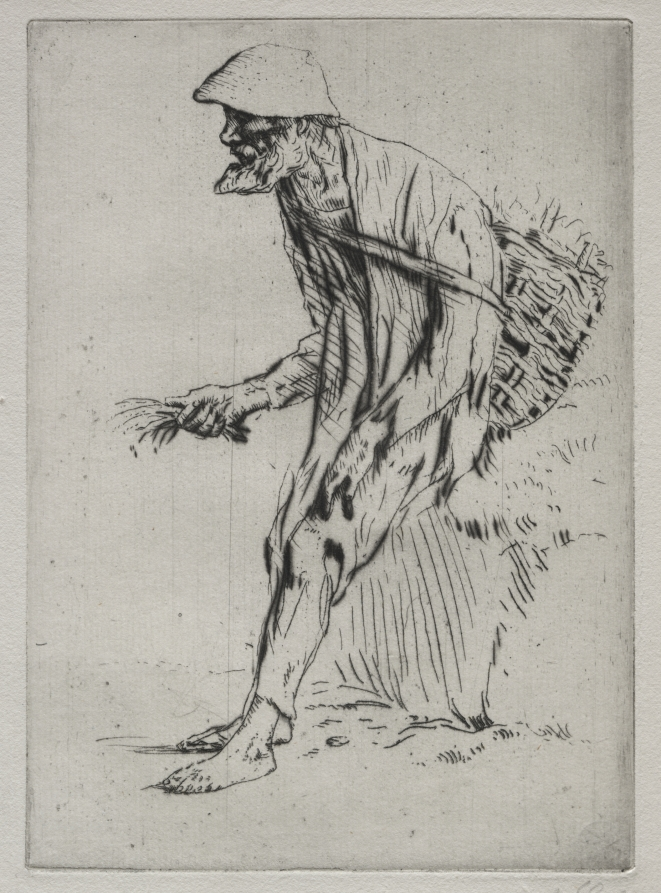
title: The Red Pimpernel Vender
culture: France, 19th century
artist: Alphonse Legros (French, 1837–1911)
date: c. 1857–1911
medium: drypoint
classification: Print